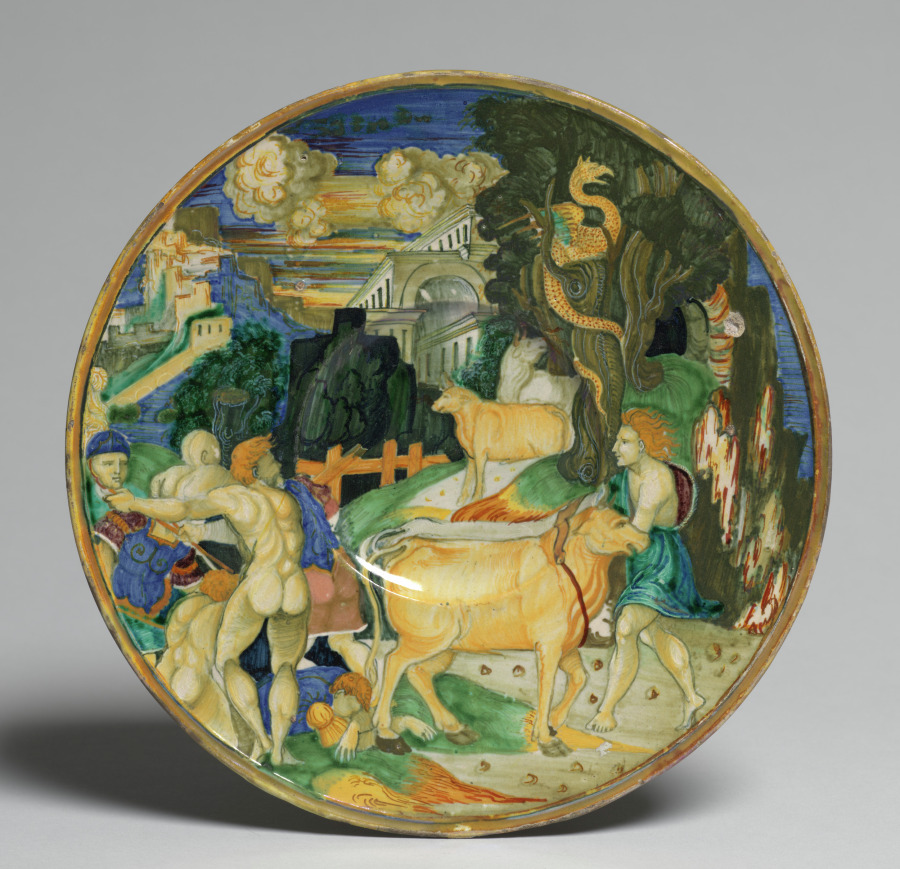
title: Plate Depicting the Myth of Cadmus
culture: Italy, Urbino region, Gubbio, 16th century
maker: circle of Maestro Giorgio Andreoli (Italian, 1465?–1553)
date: 1526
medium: tin-glazed earthenware with gold lustre (maiolica)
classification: Ceramic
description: Obeying the command of an oracle, Cadmus followed a cow to Boeotia, or “oxen-land.” There he slayed a dragon and buried its teeth in the ground. From the teeth grew a crop of warriors who fought each other until only the strongest five remained. Cadmus invited the victors to join him, and together they built the city of Thebes, where the mythological hero, Hercules (or Herakles) was later born.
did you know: This plate depicts multiple scenes from the Greek myth of Cadmus.